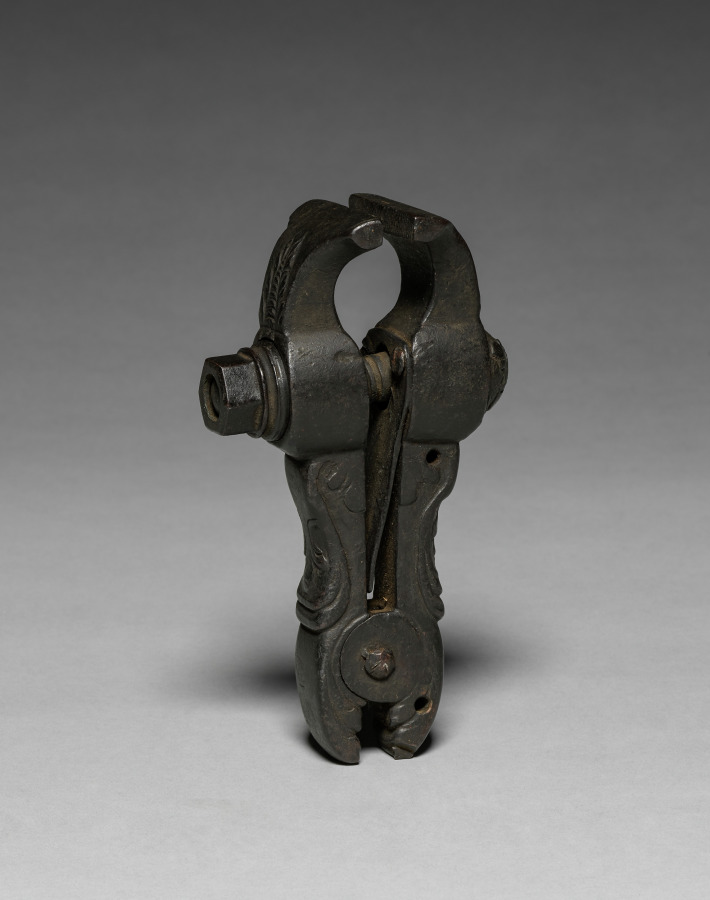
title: Hand Vice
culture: Germany (?)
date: 1600s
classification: Tool